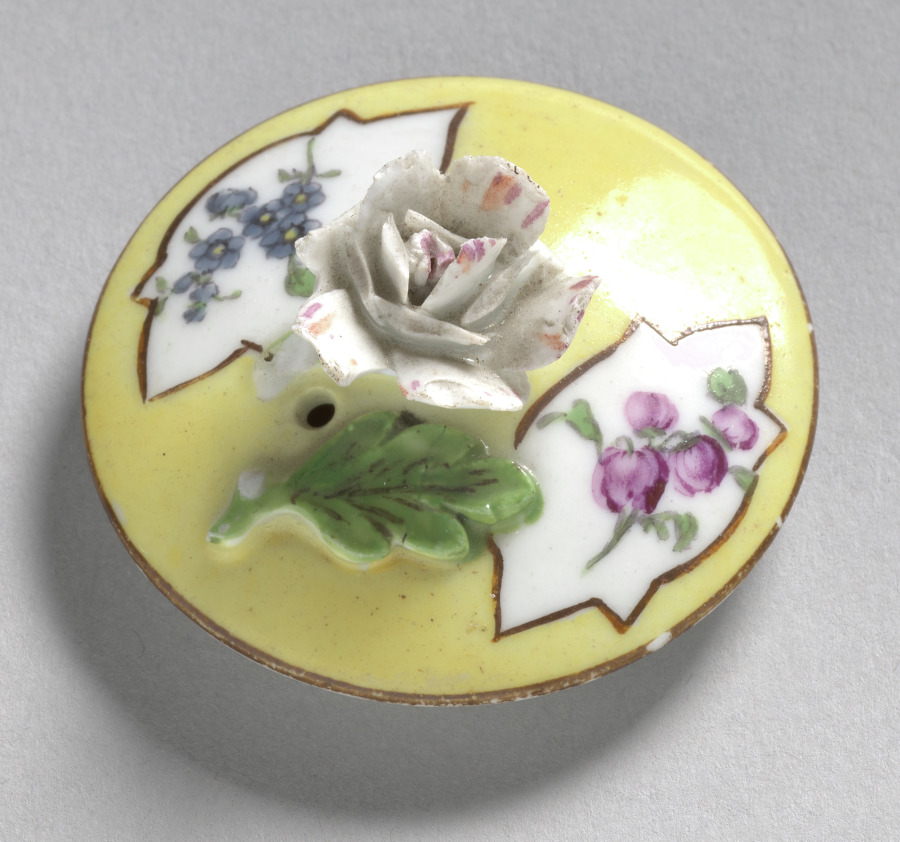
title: Lid for a Teapot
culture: Germany, Meissen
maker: Meissen Porcelain Factory (German, est. c. 1710)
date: c. 1750–70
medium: porcelain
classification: Ceramic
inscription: Mark on the bottom that looks like two swords crossing, with a small V intersecting.